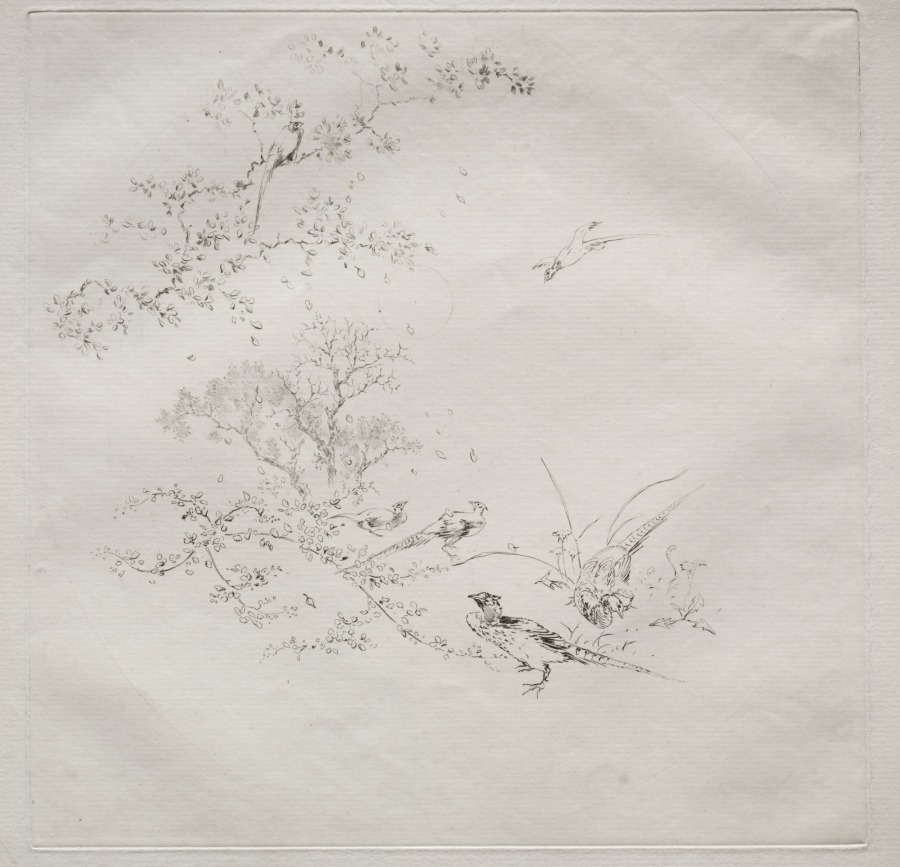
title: Parisian Service (Haviland service)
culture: France, 19th century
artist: Félix Bracquemond (French, 1833–1914)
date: 1875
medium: etching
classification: Print